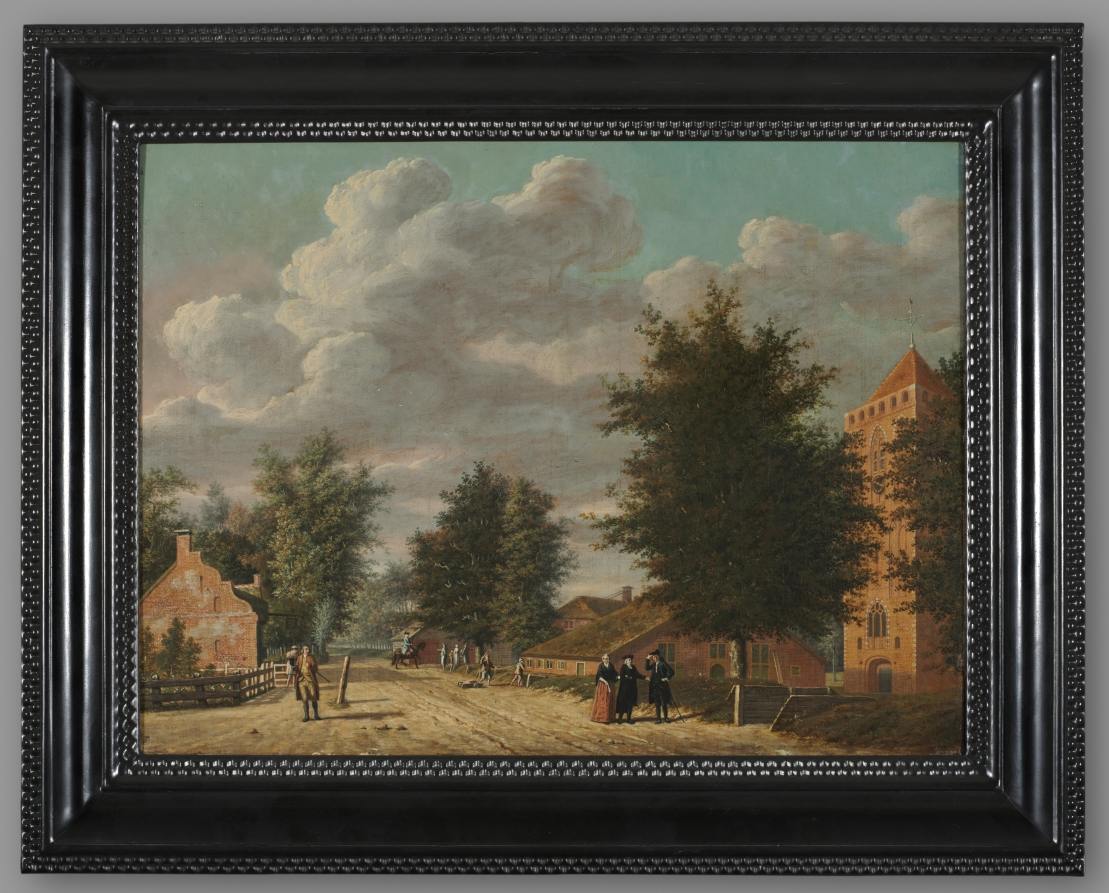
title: View of the Village of Eemnes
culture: Netherlands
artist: Jordanus Hoorn (Dutch, 1753–1833)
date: 1778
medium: oil on canvas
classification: Painting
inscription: Signed on wooden fence in lower right: J.: Hoorn. fi/ 1778